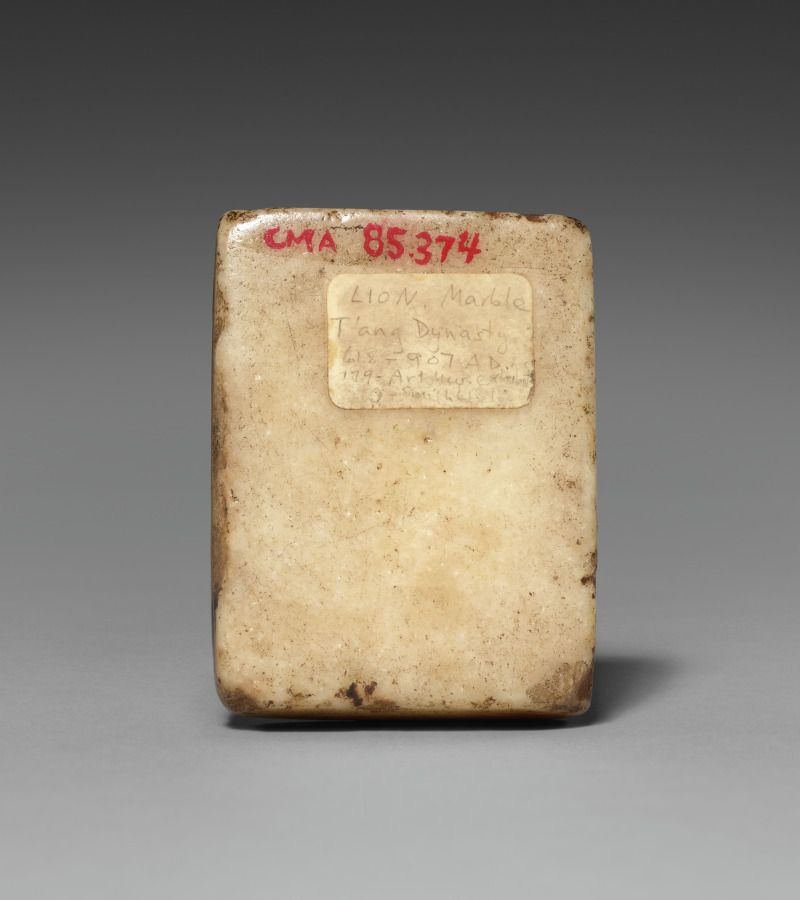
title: Lion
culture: China, Tang dynasty (618-907)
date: 618–907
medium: marble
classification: Sculpture